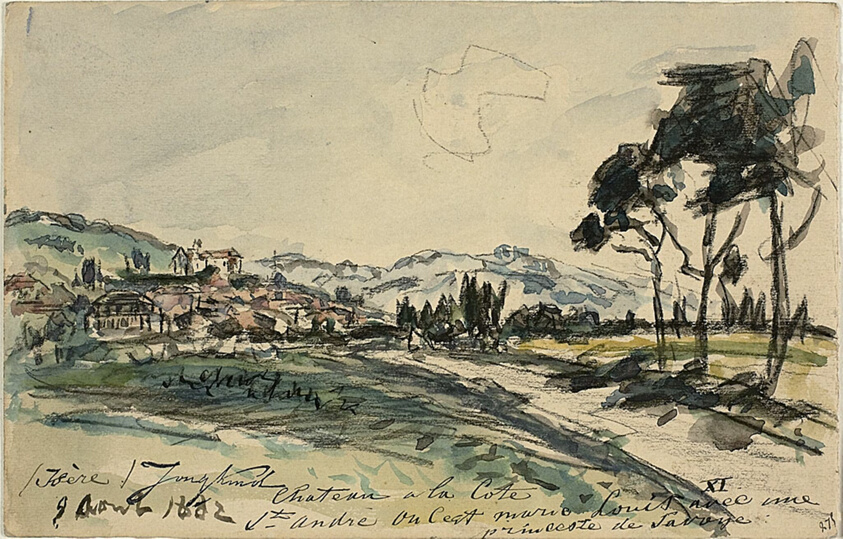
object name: Drawing and Watercolor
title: Chateau, Cote Saint Andre (recto) Empty Cart and Shed with Other Sketches (verso)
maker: Johan Barthold Jongkind (Dutch, 1819-1891)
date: 1882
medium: Watercolor, with black conte crayon, on cream wove paper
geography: Holland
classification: watercolor; drawings (visual works); prints and drawing